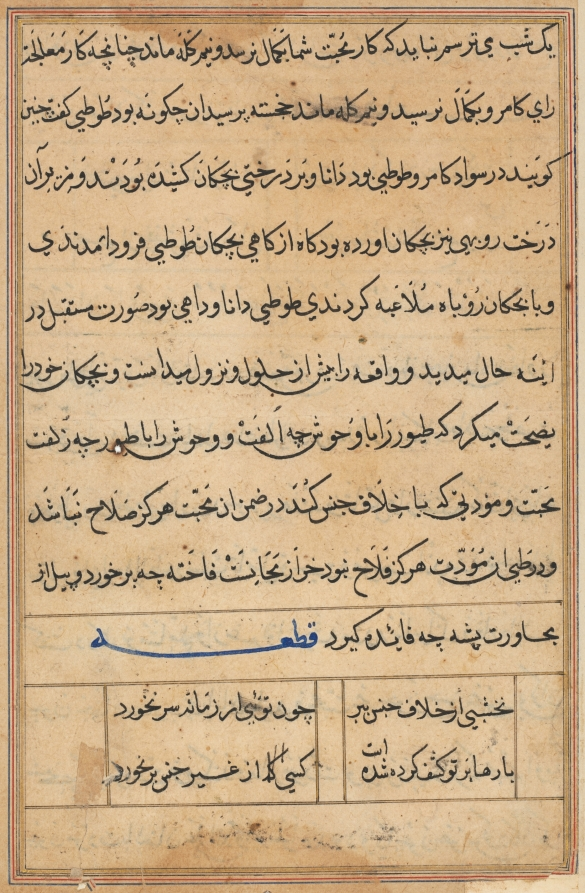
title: Page from Tales of a Parrot (Tuti-nama): text page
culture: Mughal India, court of Akbar (reigned 1556–1605)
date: c. 1560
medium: gum tempera, ink, and gold on paper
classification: Painting